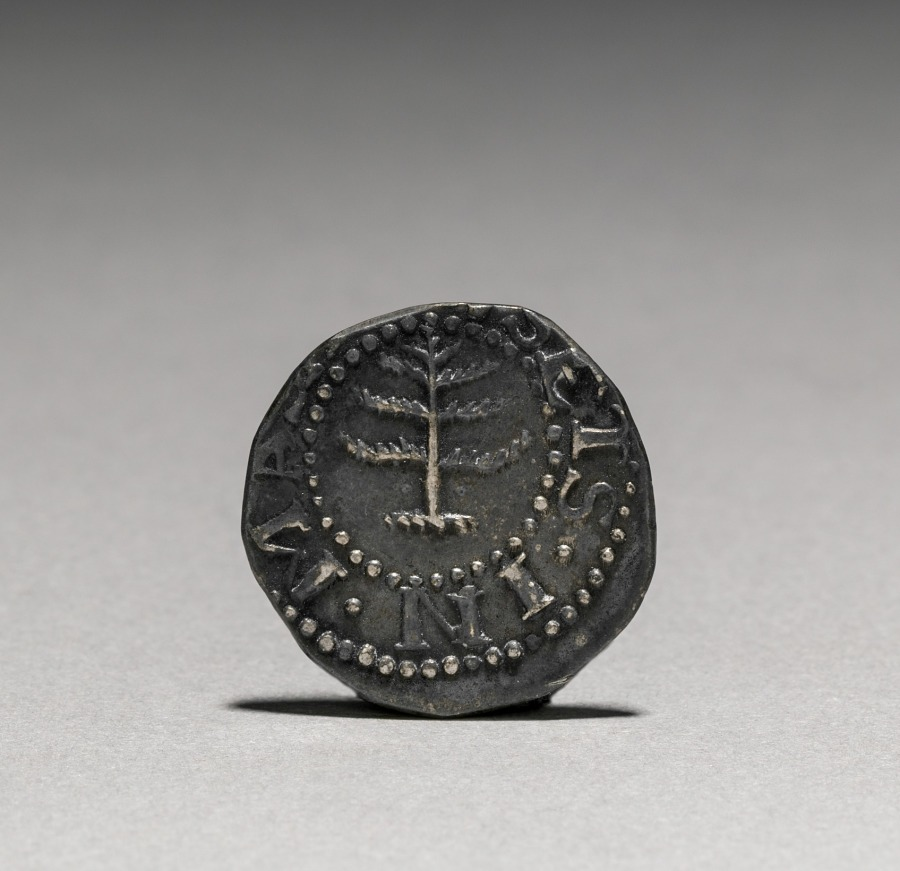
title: Pine Tree Sixpence (obverse)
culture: America, Massachusetts, Boston, 17th century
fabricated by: John Hull (American, 1624–1683)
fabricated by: Robert Sanderson (American, 1609–1693)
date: 1652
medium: silver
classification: Coins